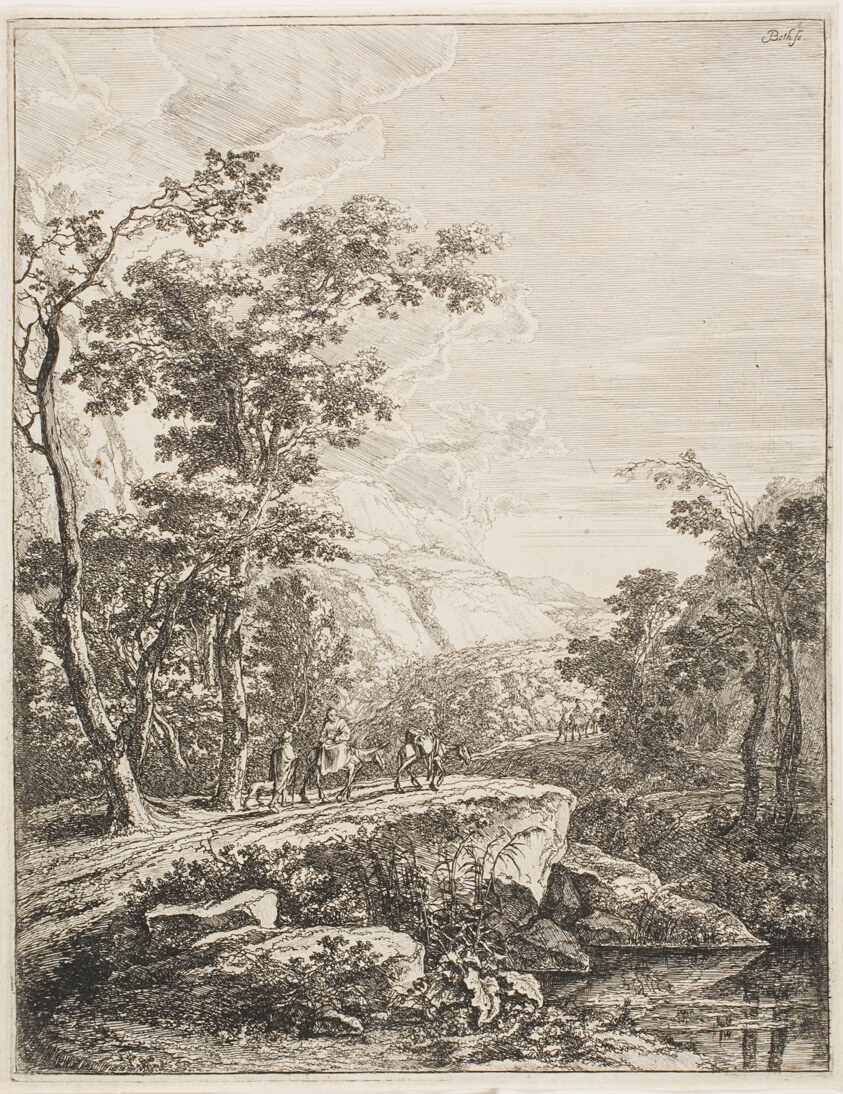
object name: Print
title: Upright Italian Landscapes: Woman on a Mule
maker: Jan Both (Dutch, c. 1618-1652)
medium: Etching on paper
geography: Holland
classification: etching; print; prints and drawing